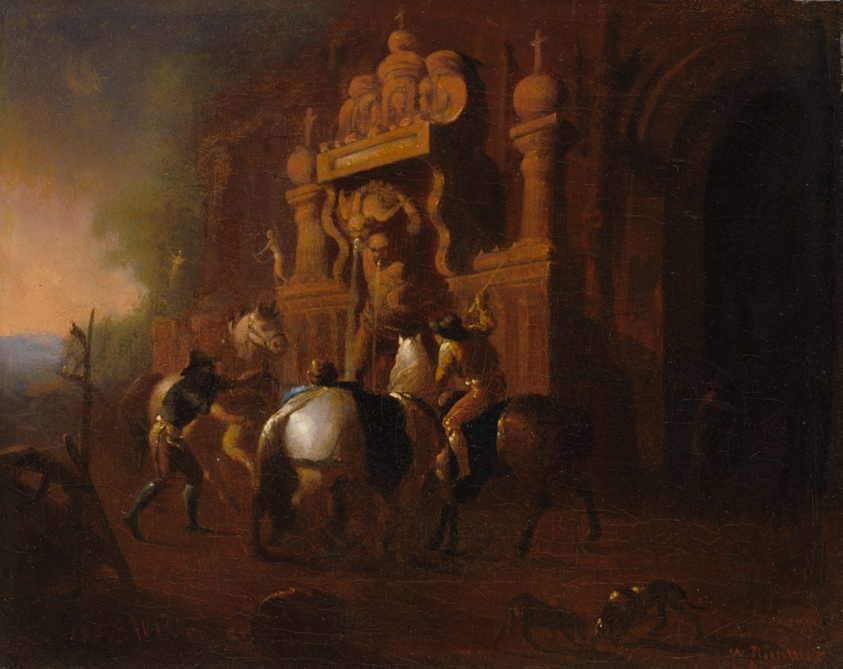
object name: Painting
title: Horses at a Fountain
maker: William Rimmer (American, born England, 1816–1879)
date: 1856–57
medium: Oil on canvas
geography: United States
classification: painting; american arts